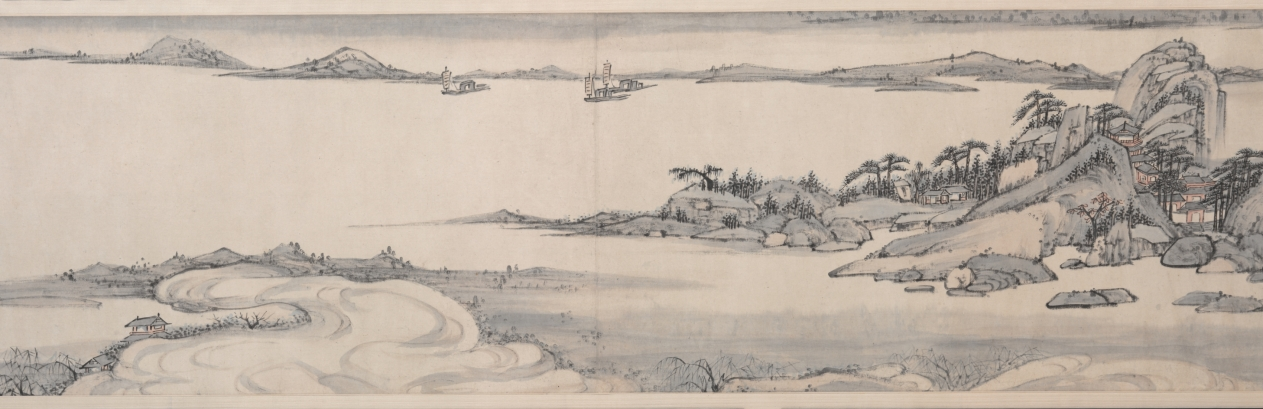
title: Pure Tones among Hills and Waters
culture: China, Qing dynasty (1644-1911)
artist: Xiao Yuncong (Chinese, 1596–1673)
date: 1664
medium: Handscroll; ink and light color on paper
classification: Painting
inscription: 種松發秀色，具是高人心。/ 鑿石築茅屋，長年覆綠陰。/ 白雲無意出，舒卷趨空林。/ 萬籟時一寂，微風墮清音。/ 此情莫可擬，此景誰能論。/ 只向千峰裏，共彈五絃琴。/ 桃花依綠水，不覺又春深。 甲辰花朝題于青蓮閣, 鐘山老人蕭雲從。[印] 鐘山老人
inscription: Title and inscription, dated 1744, and 3 seals of Shen Feng 沈鳳 (1685-1755).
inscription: 4 colophons and 24 additional seals: 1 colophon, dated 1811, and 5 seals of Xiang Yuan 項源 (active about 1811); 1 colophon, dated 1858, and 2 seals of Qi Junzao 祁寯藻 (1793-1866); 1 colophon and 4 seals of Zhang Yunzhong 張允中 (1881–1960?); 4 seals of Jiang Xun 江恂 (active about 1753–after 1780); 1 colophon dated 1943, and 2 seals of Wang Shaoming 汪兆銘 (Wang Jingwei 汪精衛, 1883–1944); 1 seal of Qi Zhiliu 祁之鏐 (active about 1858); 2 seals of Yu Zhimeng 俞芷盟 (second half of 19th century); 4 seals unidentified.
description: Painted at age 68, this landscape is one of Xiao Yuncong’s most mature works. Extraordinary in its combination of fine details with bold brushstrokes and bluish washes, it is also one of his longest compositions in handscroll format, extending over 23 feet. Throughout his lifetime, Xiao visited Nanjing and Yangzhou, where he met with other painters and literati. Regarded as the founder of the Gushu school (姑孰派) of painting, Xiao painted from nature, and his landscapes are informed by his travels, as well as by his experience as a print designer.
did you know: Biographical notes on Xiao Yuncong relate that he did not pursue the career of an official, but "furnished a cottage in the eastern suburbs [of Wuhu in Anhui province] and amused himself playing the qin (zither) and reading every day."